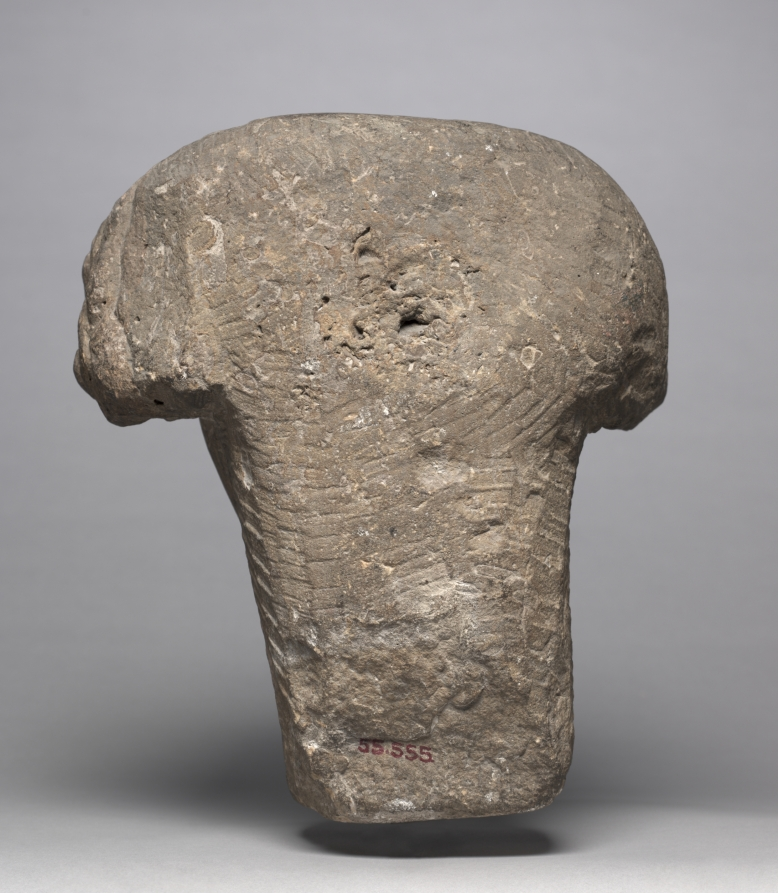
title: Celtic Head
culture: Northern England (Romano-British), Migration period, 2nd-3rd centuries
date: 100–300 CE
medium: sandstone with traces of original red paint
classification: Sculpture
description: This stone head has never been attached to a torso. It is known from ancient literary sources that the Celts, who originally occupied most of northern Europe from Hungary to the British Isles, practiced ritualistic veneration of the human head. For the Celts, the human head represented the seat of mankind’s magical energy. Stone heads similar to this one have survived in large numbers, especially in the upland regions of northern England (the Pennines, the Peak District, and Cumbria) where this one was undoubtedly made by British Celts during the Roman occupation. Such stone heads were probably placed in religious shrines or grottos generally associated with springs, well heads, or natural landmarks for ritual veneration.